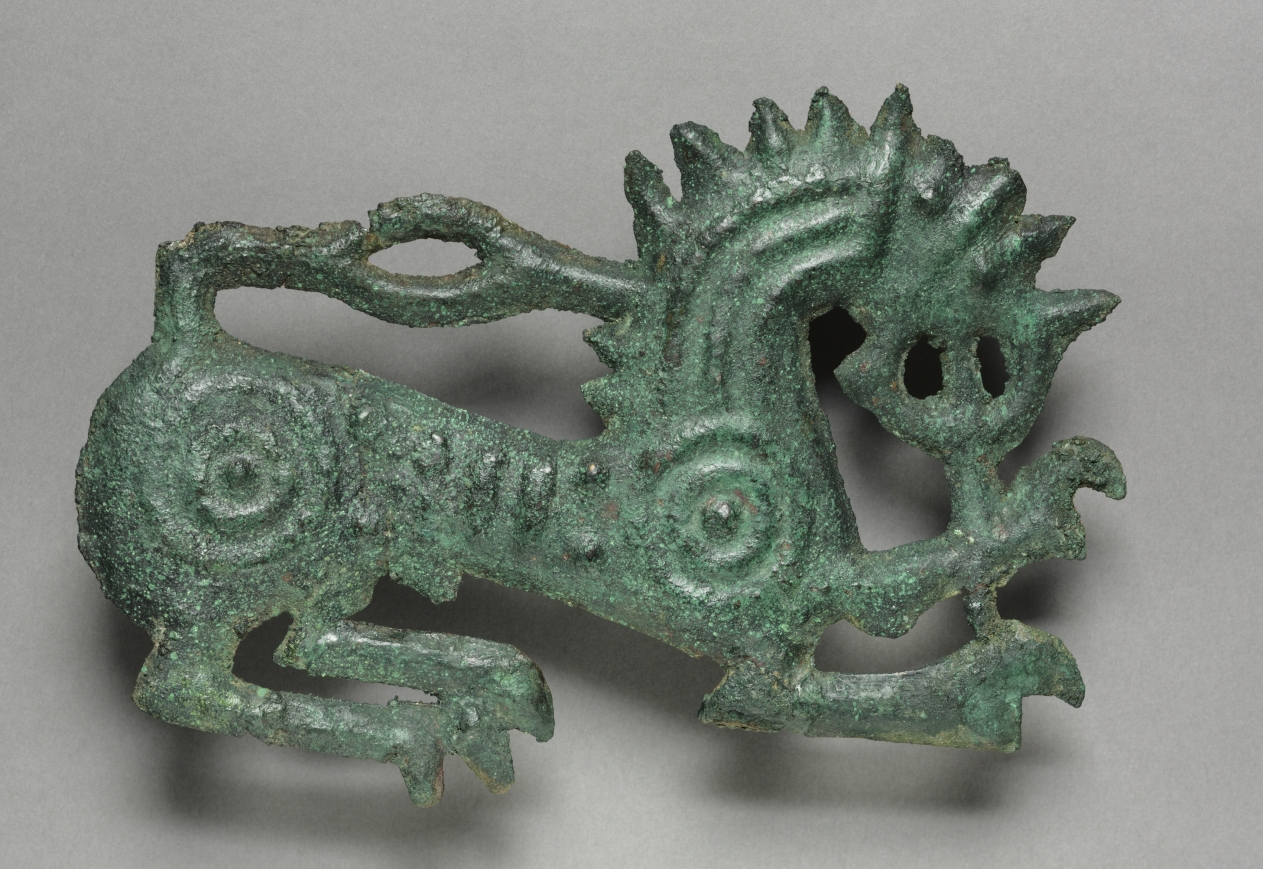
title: Lion Plaque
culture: Central Asia, Iran, Scythian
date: 1000–500 BCE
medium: bronze, repoussé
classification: Sculpture